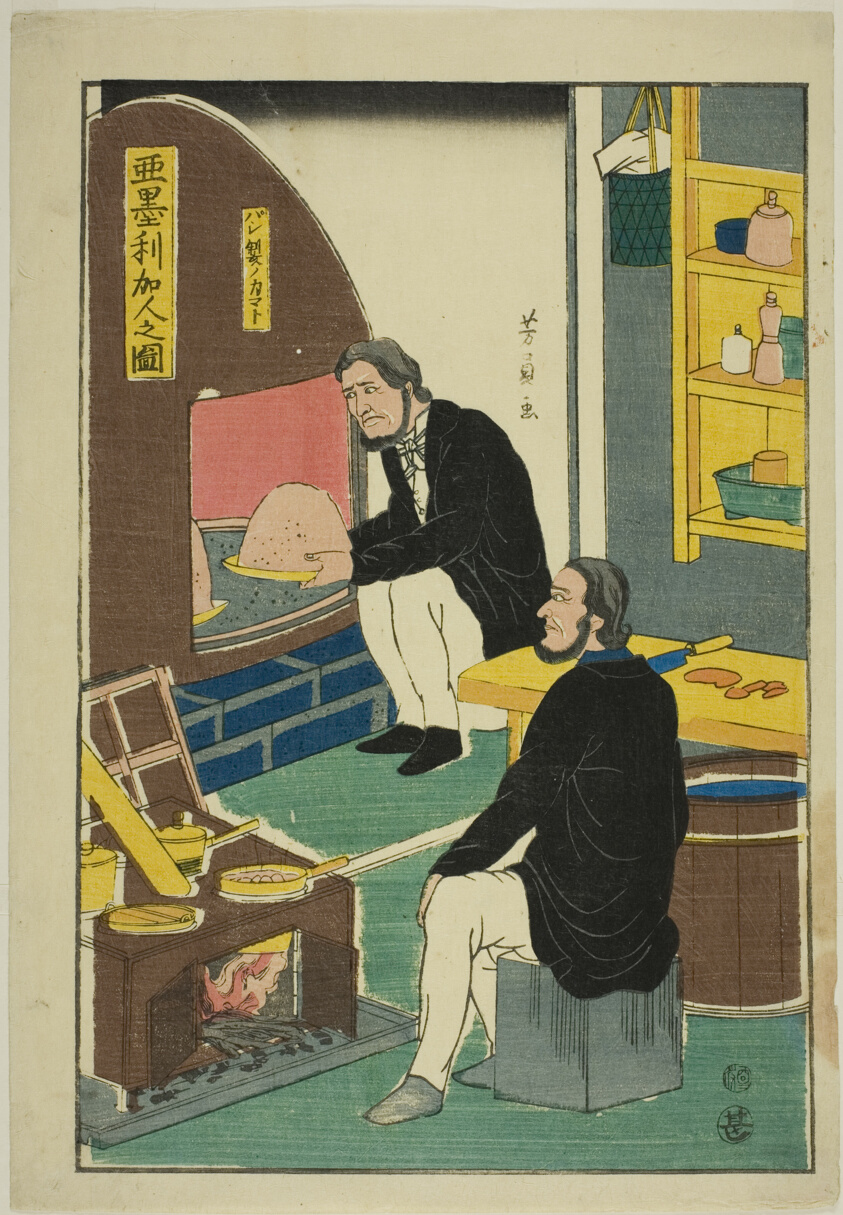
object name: Print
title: Portrait of Americans: Oven for Breadmaking (Amerika-jin no zu, pansei no kamato)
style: Japanese (culture or style)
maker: Utagawa Yoshikazu (Japanese, active c. 1850-70)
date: 1861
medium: Color woodblock print; oban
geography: Japan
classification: woodblock print; print; asian art